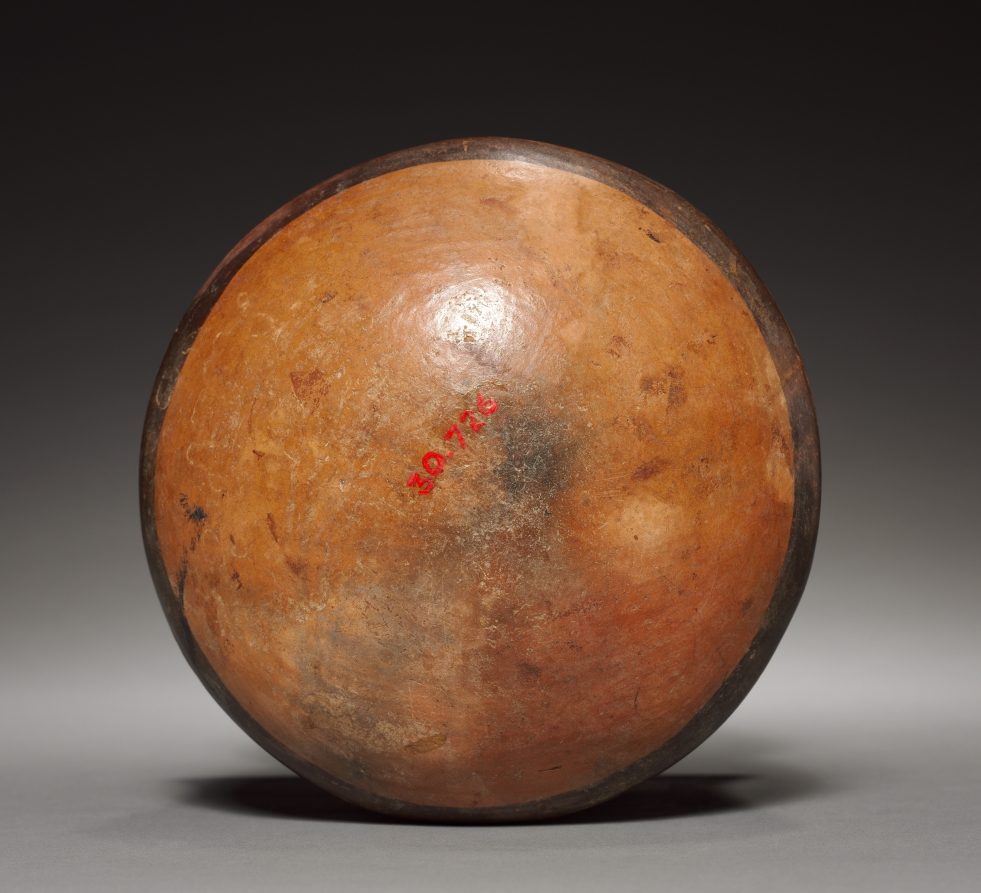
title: Vase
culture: Peru, South Coast, Nasca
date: 2000–20 BCE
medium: pottery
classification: Ceramic